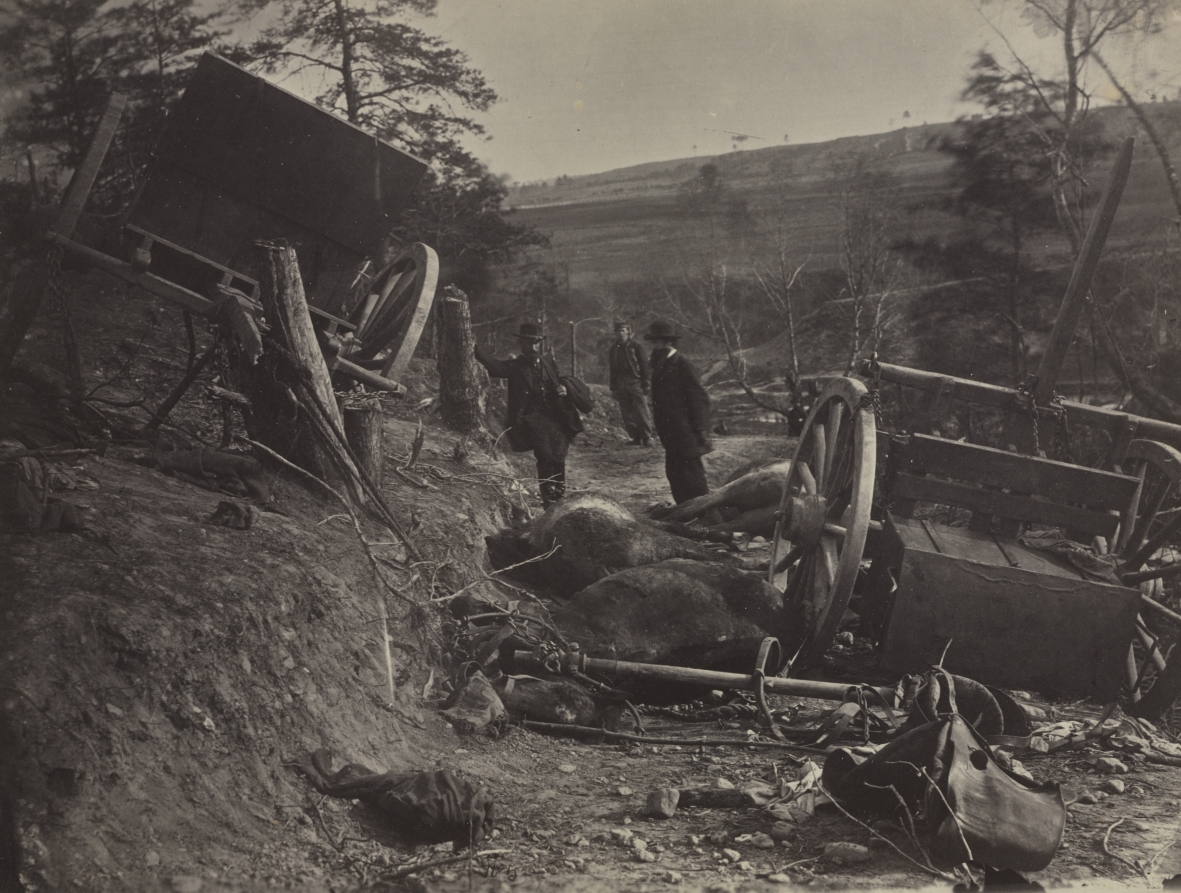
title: Effects of a Shell Explosion, Fredericksburg, VA.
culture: America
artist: Andrew Joseph Russell (American, 1830–1902)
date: 1863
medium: albumen print from wet collodion negative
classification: Photograph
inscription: written in pencil on recto: "DUP"